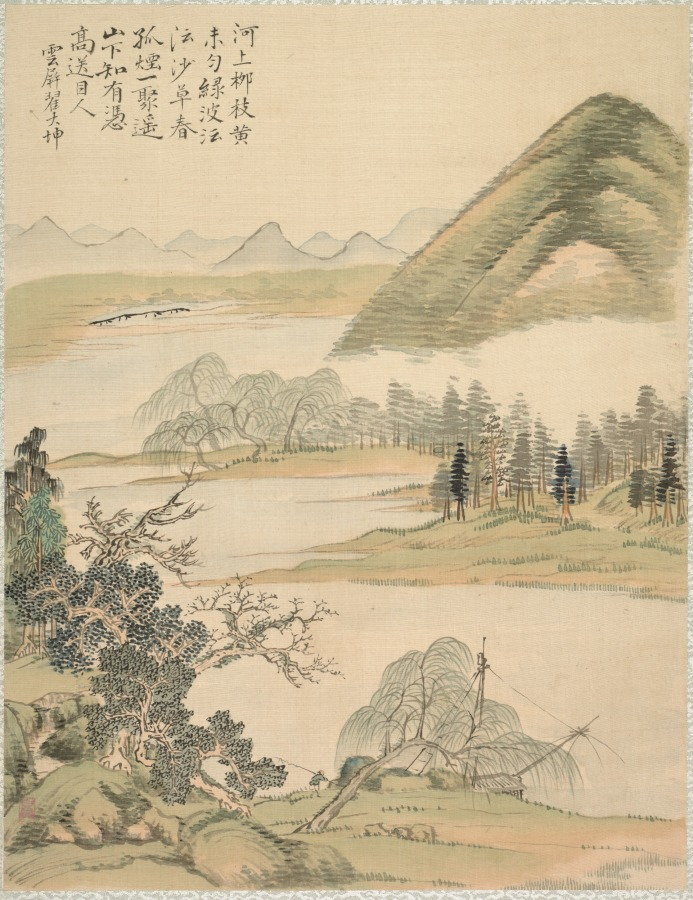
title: Willow Branches in Spring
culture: Japan, Edo period (1615–1868)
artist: Tsubaki Chinzan (Japanese, 1801–1854)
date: 1847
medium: album leaf; ink and color on silk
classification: Portfolio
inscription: Tsubaki Chinzan inscribed each leaf with the same inscription that Zhai Dakun wrote on his album leaves.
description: As the title of this album suggests, Tsubaki Chinzan painted each of the landscapes included in the album after interpretations of the styles of old masters by Chinese painter Zhai Dakun (翟大坤, active 1730–1804). In addition to the painted compositions, he also copied the inscriptions on Zhai Dakun's paintings.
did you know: This composition was inspired by Zhai Dakun's album leaf, CMA 1986.49.3.